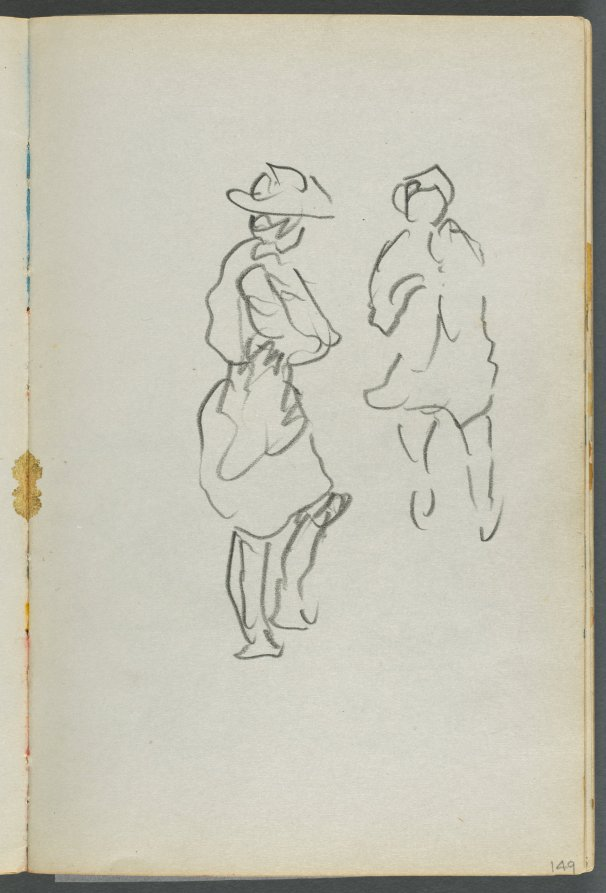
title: Sketchbook, The Dells, N° 127, page 149: Two Figures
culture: America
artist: Maurice Prendergast (American, born Newfoundland [now Canada], 1858–1924)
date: c. 1919–1921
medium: graphite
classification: Bound Volume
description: This sketchbook contains 59 pages of graphite drawings and 16 watercolors made at various locations on Cape Ann, Massachusetts.